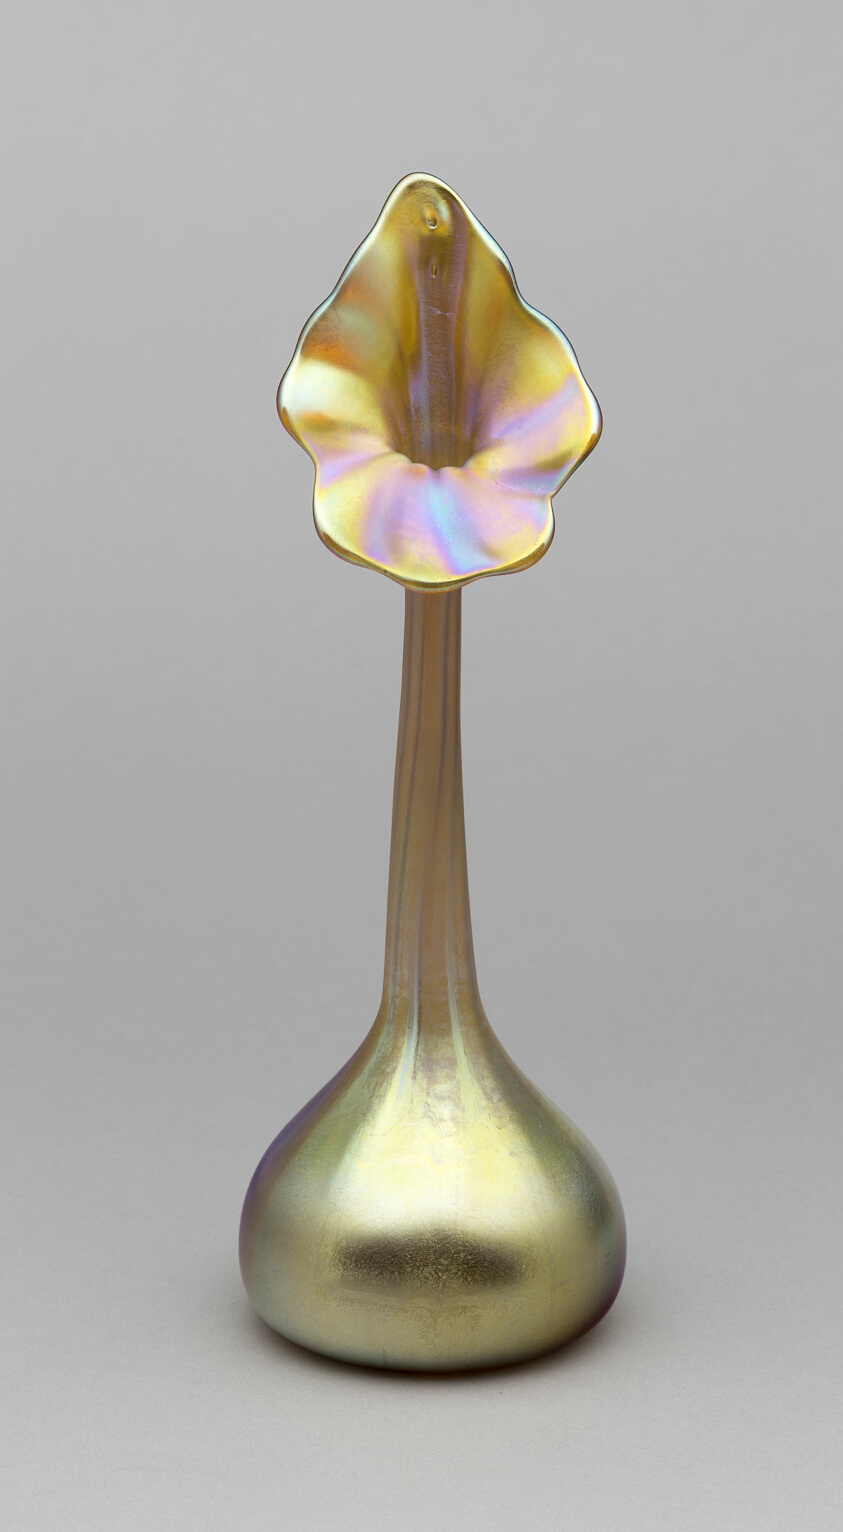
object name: Glass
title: Bud vase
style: Arts and Crafts Movement, American Arts and Crafts Movement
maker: Tiffany Glass and Decorating Company (American, 1894–1902); or Tiffany Studios (American, 1902–32); Corona, New York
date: c. 1905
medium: Iridescent glass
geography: Corona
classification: vase; glass; american decorative arts; american arts; decorative arts